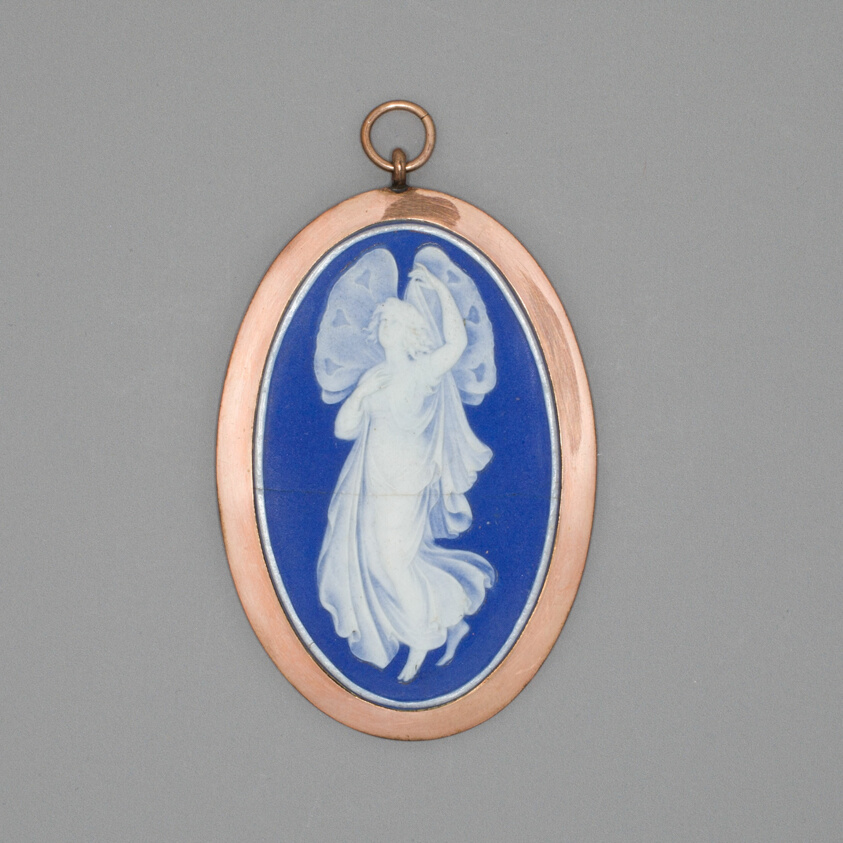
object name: Ceramics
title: Medallion with Zephyrus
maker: Wedgwood Manufactory (England, founded 1759)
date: Late 18th century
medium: Stoneware (jasperware)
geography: Burslem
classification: sculpture; stoneware; european decorative arts; ceramics